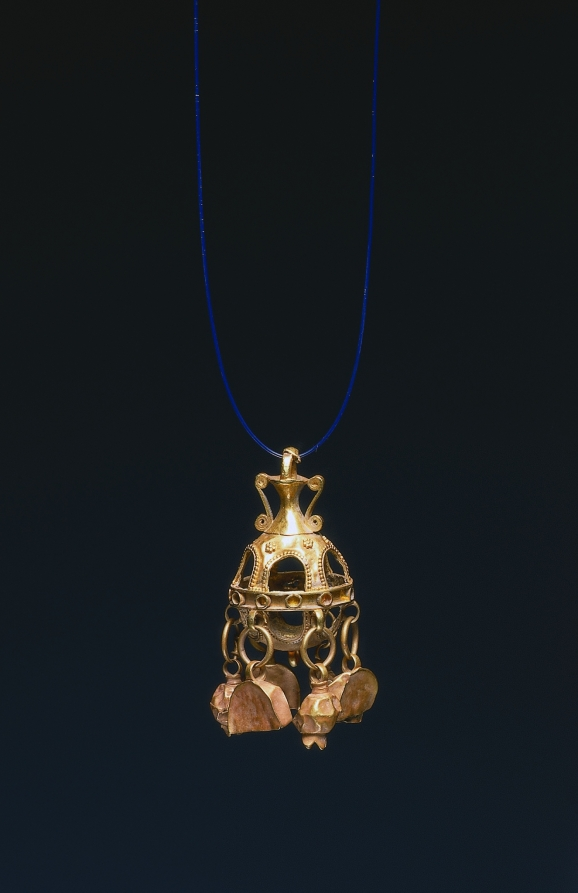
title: Pendant or Earring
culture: Parthian Empire (247 BCE–224 CE)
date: 1–200 CE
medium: gold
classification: Jewelry